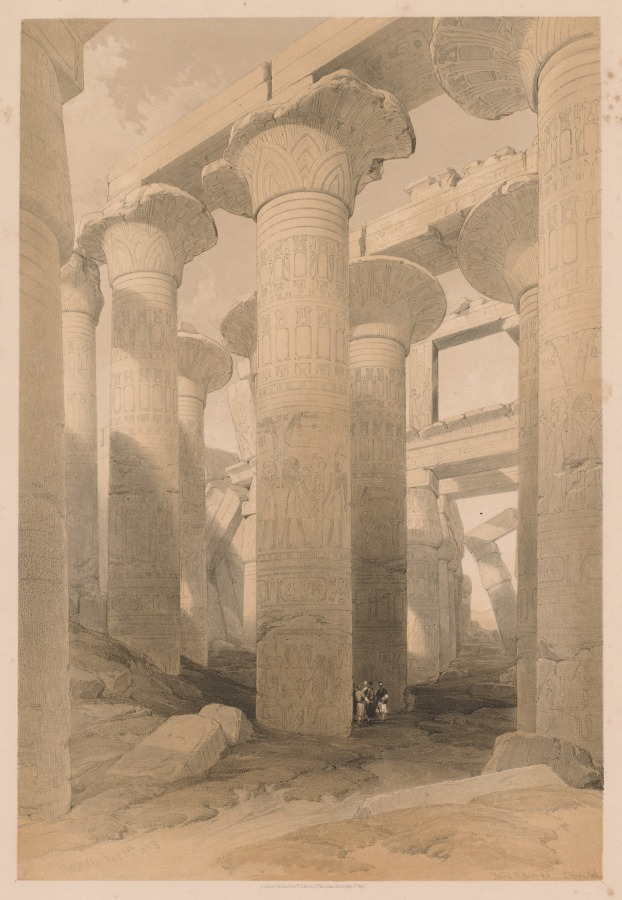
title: Egypt and Nubia: Volume II - No. 14, Karnak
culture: England, 19th century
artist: Louis Haghe (British, 1806–1885)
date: 1838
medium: color lithograph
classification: Print